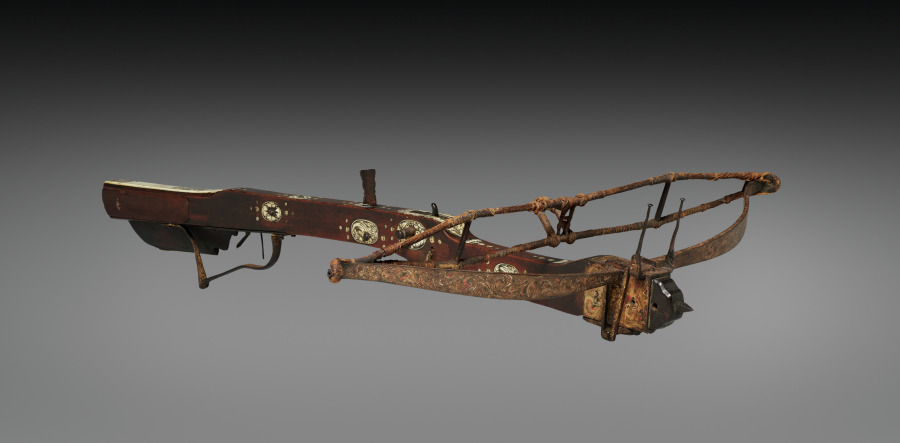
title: Pellet Crossbow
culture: Germany (?)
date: 1600s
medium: wood, inlaid with stag horn; flax cord; steel with traces of paint and gilding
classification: Arms and Armor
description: This ornate pellet crossbow is designed to fire molded clay pellets or small rocks, giving it the name stonebow. The bow is hand drawn and used for hunting small game.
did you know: This is a custom-made crossbow combining popular Italian and German designs of the 1600s.